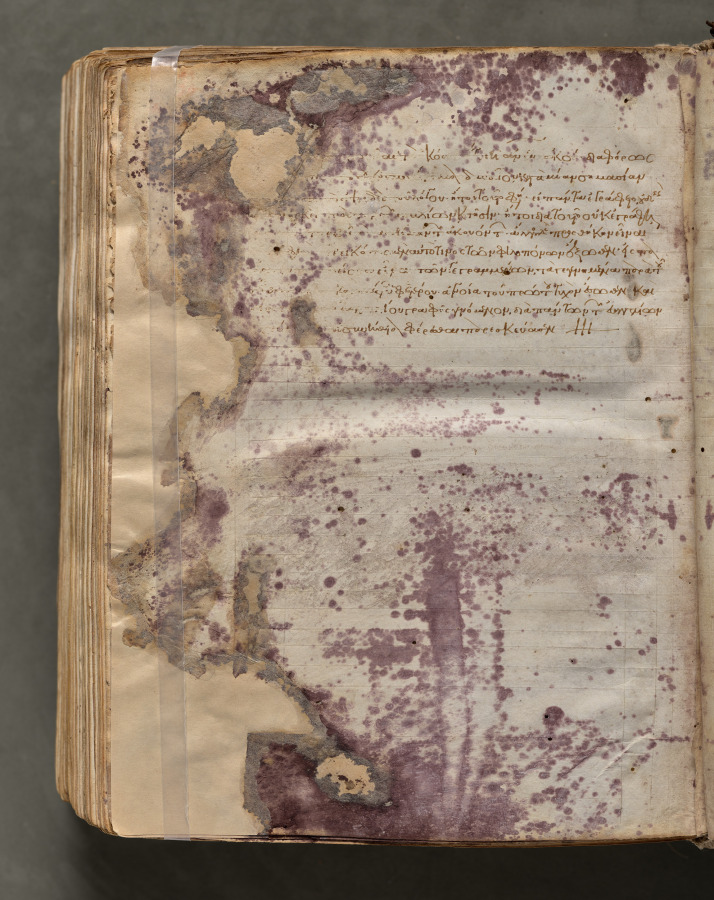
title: Text, folio 425 (verso), from a Gospel Book with Commentaries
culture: Byzantium, Constantinople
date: c. 1000–1100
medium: ink, tempera, and gold on vellum; leather binding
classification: Bound Volume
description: Each of the four gospels in this book opens on a page with brilliantly illuminated borders depicting the author of the text as well as birds—principally peacocks, symbols of the immortality of the soul—and fountains, representing the fountain of life and the salvation of the soul. This volume consists of 428 leaves with texts in Greek. Its level of sophistication suggests that it was probably written and decorated in a monastery in Constantinople.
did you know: Gospel books were carried in procession through Byzantine churches.